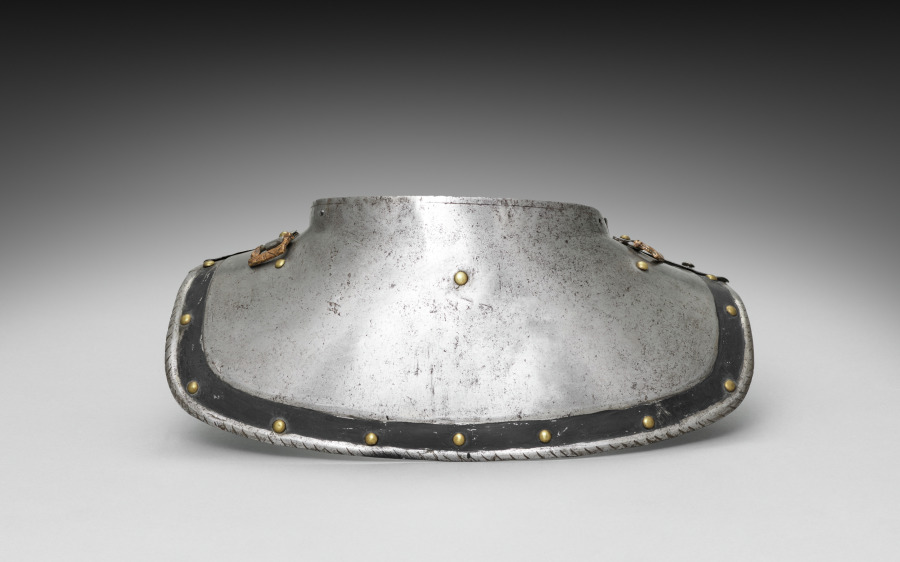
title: Colletin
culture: Germany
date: c.1550–1570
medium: iron, steel, leather and brass rivets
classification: Arms and Armor